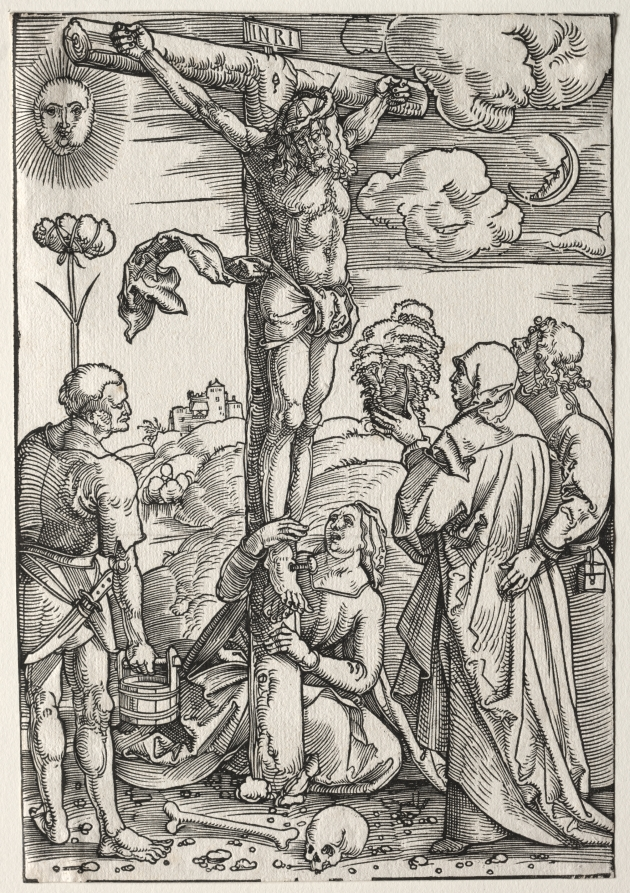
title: Christ on the Cross with Mary, St. John, Mary Magdalen and St. Stephen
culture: Germany, early 16th Century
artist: Hans Baldung (German, 1484/85–1545)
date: 1505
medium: woodcut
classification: Print